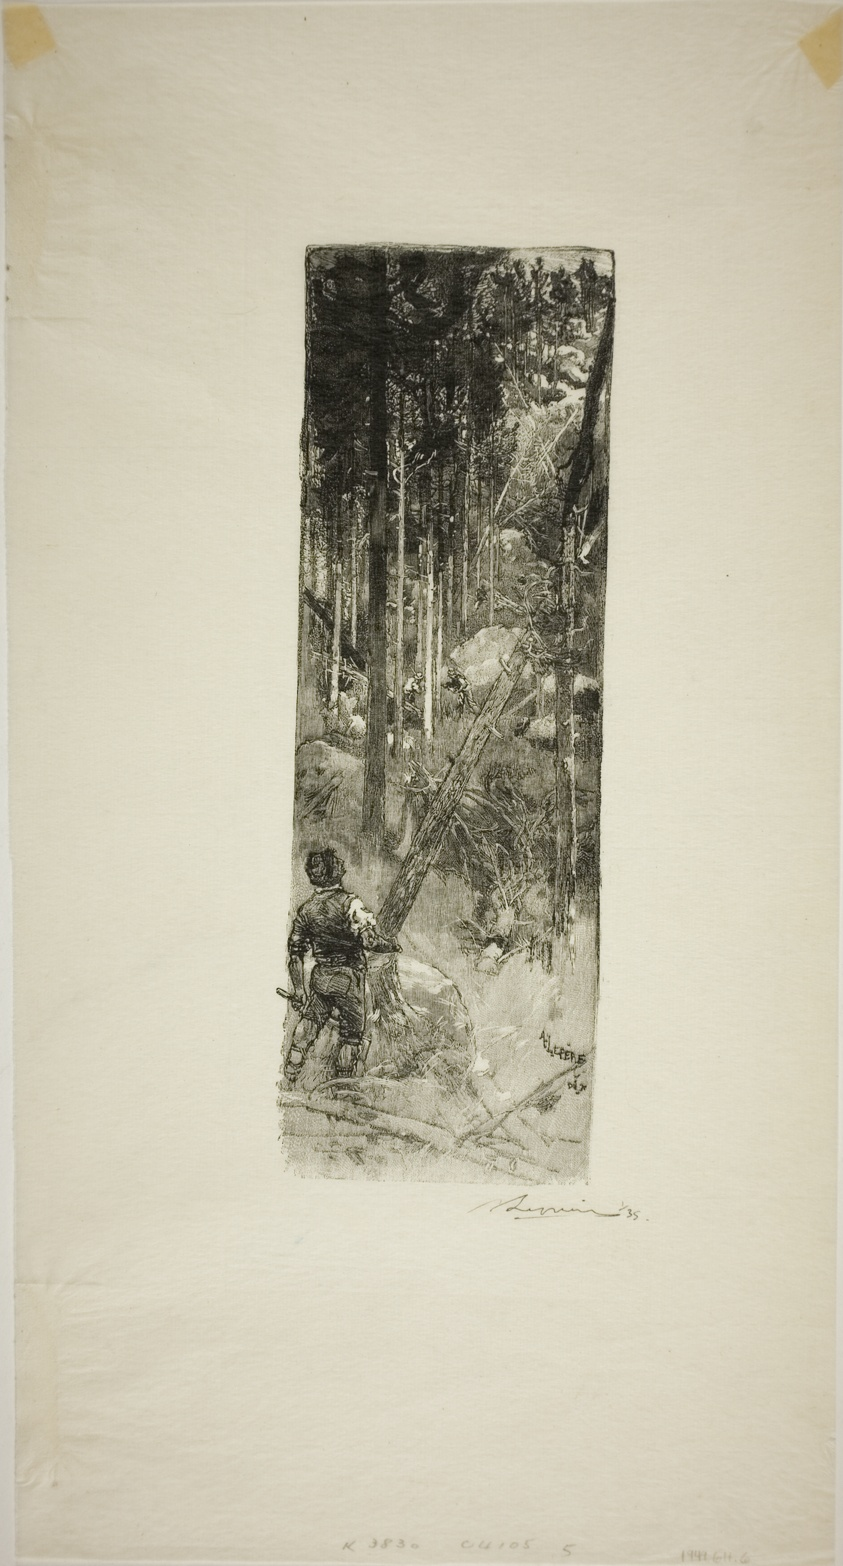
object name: Print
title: Falling Pines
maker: Louis Auguste Lepère (French, 1849-1918); published by A. Desmoulins (French, active c. 1908-1910)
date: published 1908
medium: Wood engraving in black on cream laid Japanese paper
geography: France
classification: wood engraving; print; prints and drawing